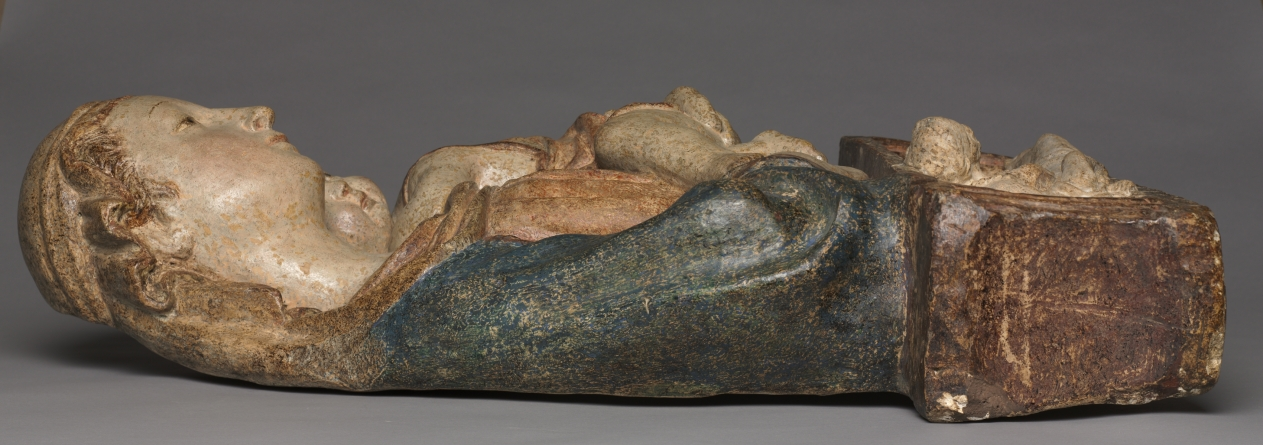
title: Madonna and Child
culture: Italy, Florence, 15th century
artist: circle of Lorenzo Ghiberti (Italian, 1378–1455)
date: c. 1450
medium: polychromed terracotta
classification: Sculpture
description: This half-length Madonna represents one of the finest of about 40 surviving variants, all of which display many characteristics of the Florentine bronze sculptor Lorenzo Ghiberti. These features include serene facial types with narrow eyes and thin eyebrows, the careful arrangement of the Madonna and Child, forehead to cheek, and the infant's twisting pose. The popularity of this devotional relief began around 1420 and continued until around 1500. Ghiberti was the most successful bronze sculptor of the early Renaissance in Florence. His fame rests upon the commissions he received for two sets of bronze doors, completed between 1401 and 1424, for the Baptistry in Florence. The reclining figure of Eve on the base of this Madonna and Child (suggesting Mary as the new Eve) stems from a similar figure on the upper left door of the Porta del Paradiso, the second set of Baptistry doors. Eve's presence on the base clearly substantiates the attribution to Ghiberti and helps date the relief.